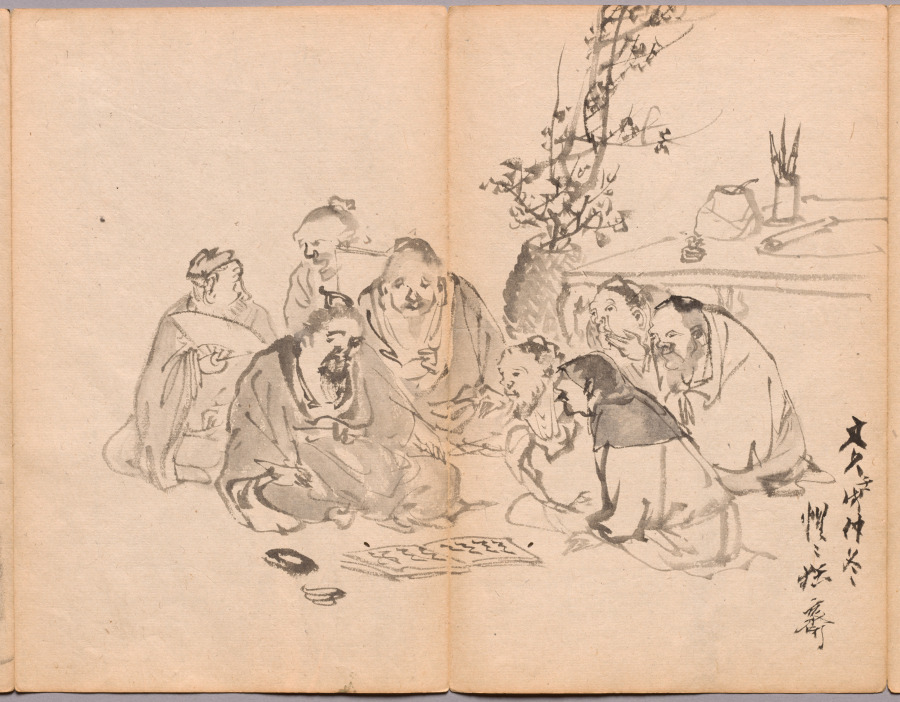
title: Scholars' Gathering from Sketch Album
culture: Japan, Edo period (1615–1868) to Meiji period (1868–1912)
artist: Kawanabe Kyōsai (Japanese, 1831–1889)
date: mid- to late 1800s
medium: Accordion-style book of 26 double-leaves; ink and color on paper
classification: Bound Volume